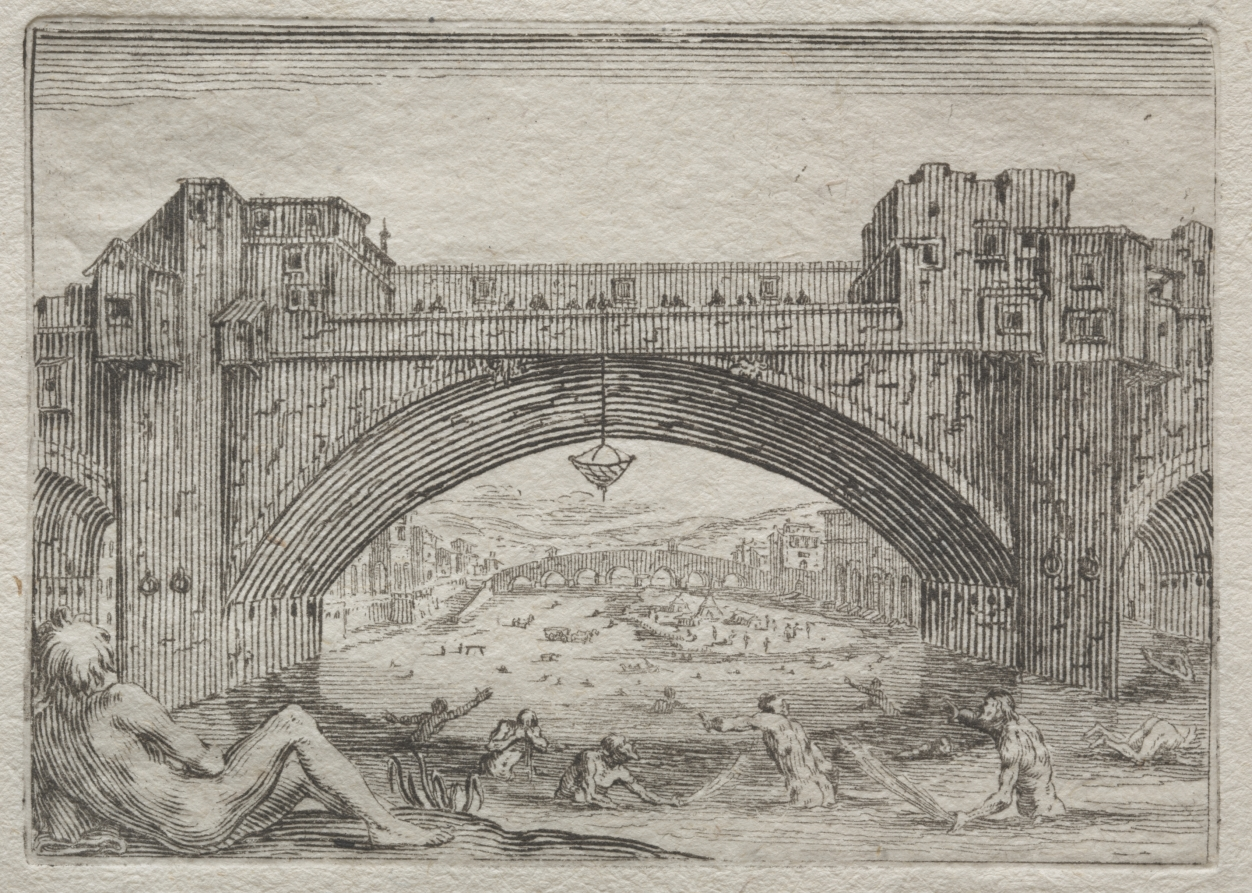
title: The Ponte Vecchio, Florence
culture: France, 17th century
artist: Jacques Callot (French, 1592–1635)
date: c. 1622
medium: etching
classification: Print